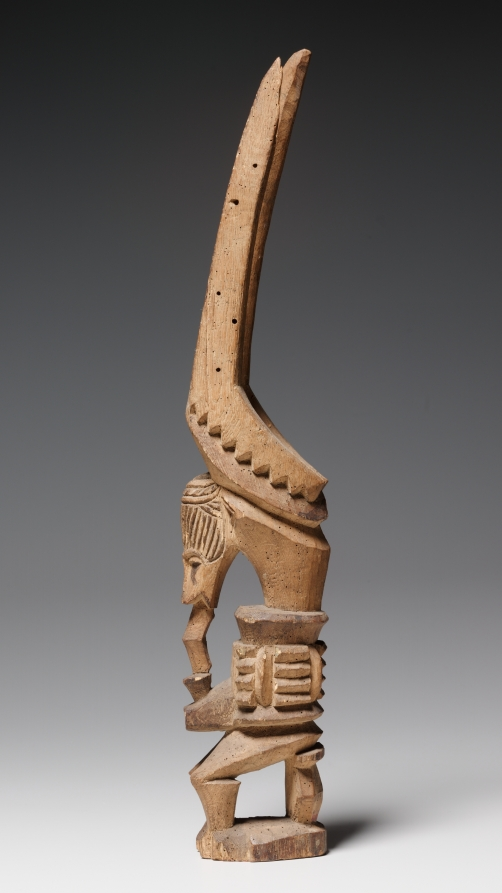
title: Shrine Figure (Ikenga)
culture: Africa, West Africa, Nigeria, Igbo style, unknown carver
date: early 1900s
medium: wood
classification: Sculpture